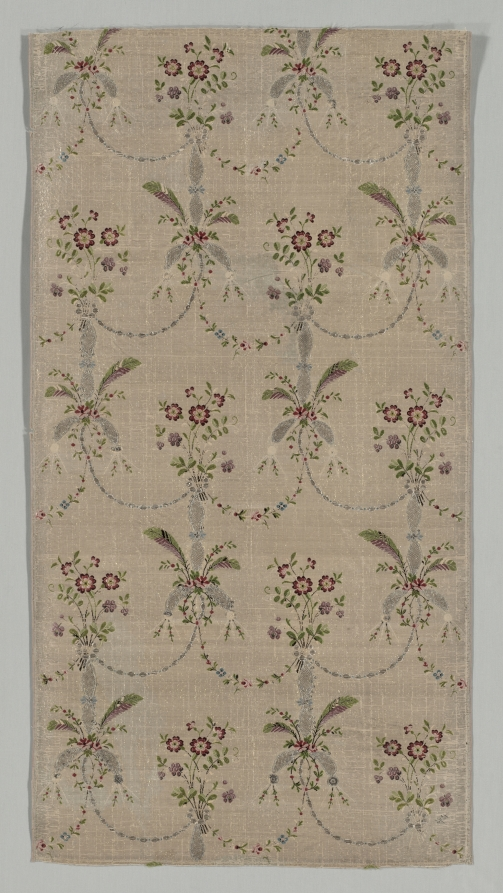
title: Textile Fragment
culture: France, 18th century, period of Louis XV (1723-1774)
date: 1723–1774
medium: plain compound cloth, brocaded; silk; some details appliqued and embroidered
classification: Textile